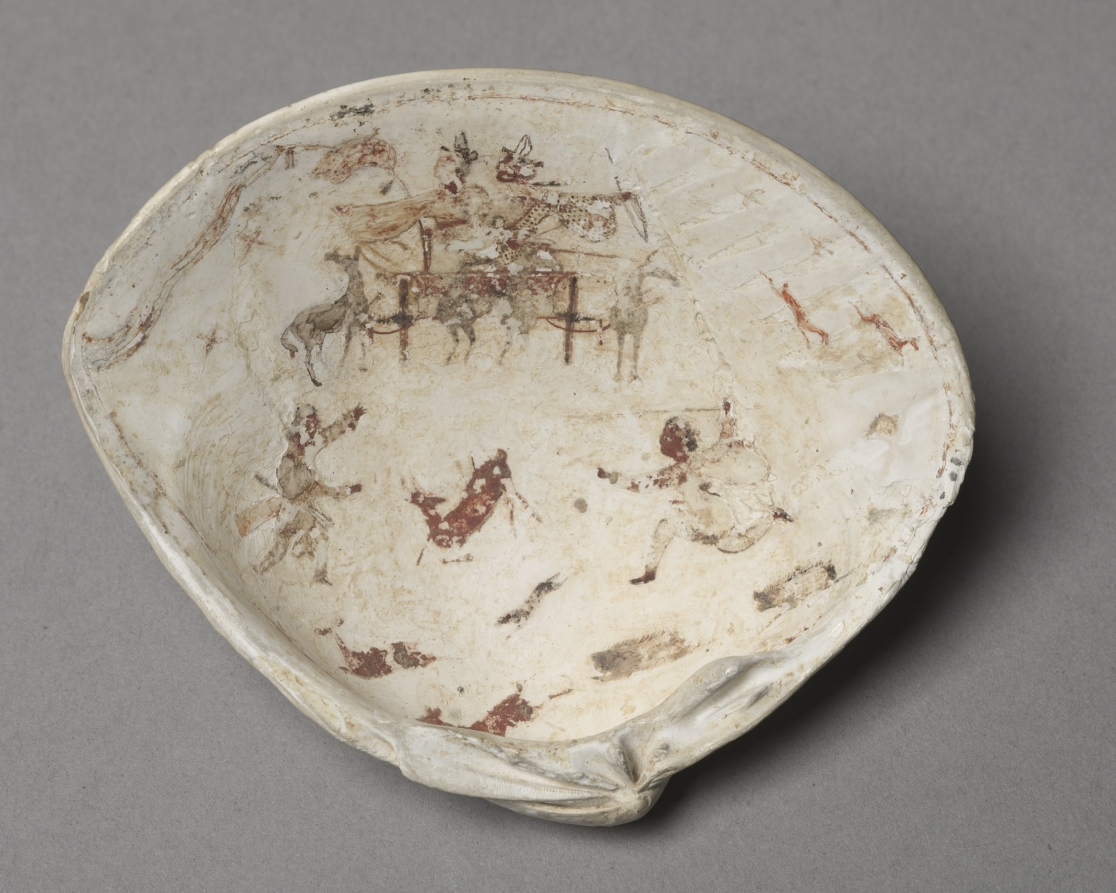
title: The Kill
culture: China, Warring States period (475–221 BCE) to Western Han dynasty (206 BCE–8 CE)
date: 300–100 BCE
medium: Painted clamshell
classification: Painting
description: The inside of this shell preserves the earliest, extant figure paintings in Chinese history.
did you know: The marine clam species to which this shell belongs is exclusive to the western Pacific Ocean near China, Japan, the Philippines, and the East Indies.